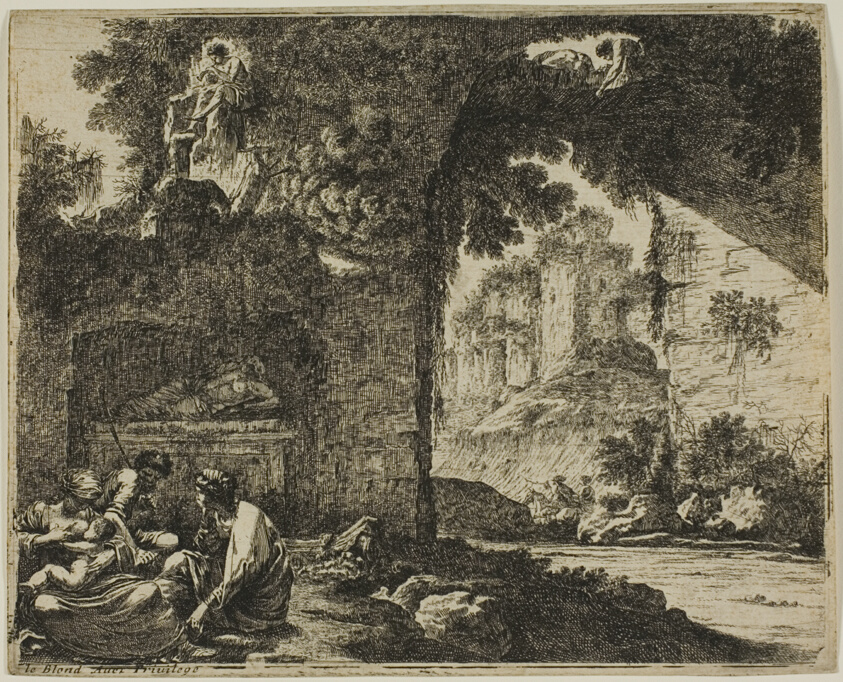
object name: Print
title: Shepherds in Ruins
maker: Jean le Pautre; French, 1618-1682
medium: Etching on ivory laid paper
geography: France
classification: prints and drawing; etching; print